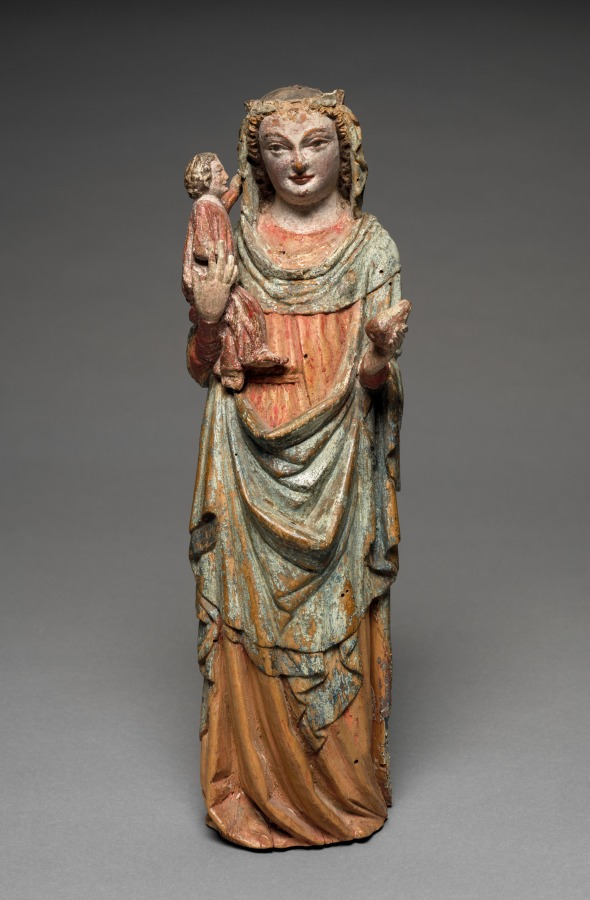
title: Reliquary Statuette of the Virgin and Child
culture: Austria, Salzburg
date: c. 1330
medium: painted lindenwood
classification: Sculpture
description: A small rectangular cavity in the back of this sculpture reveals that it was originally made to serve as a reliquary (a container for relics). In her left hand the Virgin holds a pear, a symbol of the peace and love of Christ.